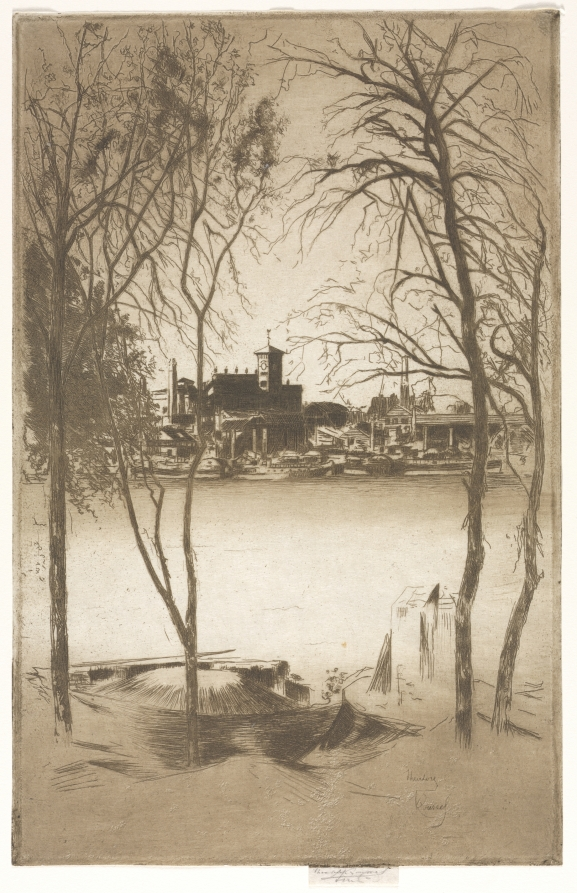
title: Laburnums and Battersea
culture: France, 19th century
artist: Theodore Roussel (French, 1847–1926)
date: 1889–1898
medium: etching and drypoint printed in brown ink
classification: Print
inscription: lower margin, in pencil: "Theodore Roussel"